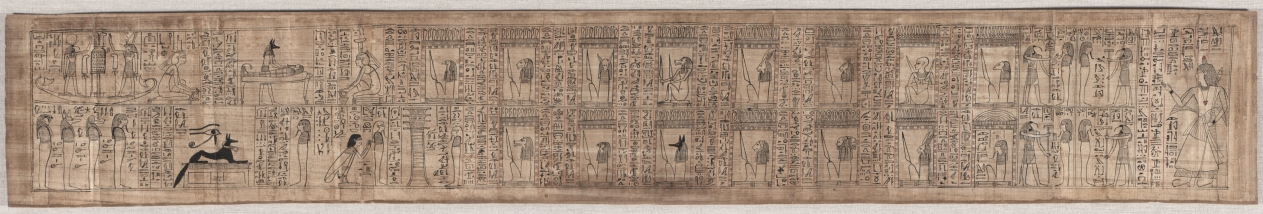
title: Book of the Dead of Hori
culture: Egypt, Third Intermediate (1069–715 BCE), Dynasty 21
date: c. 1069–945 BCE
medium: papyrus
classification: Funerary Equipment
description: The Egyptian Book of the Dead--or as they called it, the Book of Going Forth By Day--was not a single, unified, and authoritative manuscript, but a handful of special spells selected from a pool of about 200 age-old magical formulae. This illustrated Book of the Dead inscribed for the priest Hori includes the so-called Book of Gates. There are sixteen gates through which Hori must pass, each guarded by a fierce, animal-headed, knife-brandishing monster. Among them are "The Mistress of Wrath," "The Fiery One," and the "Long-Horned Bull." To reach the afterlife, Hori must present the gate-keepers with a series of secret passwords provided for him in the papyrus. At the far right, we see Hori, who having completed his task, is now reborn.